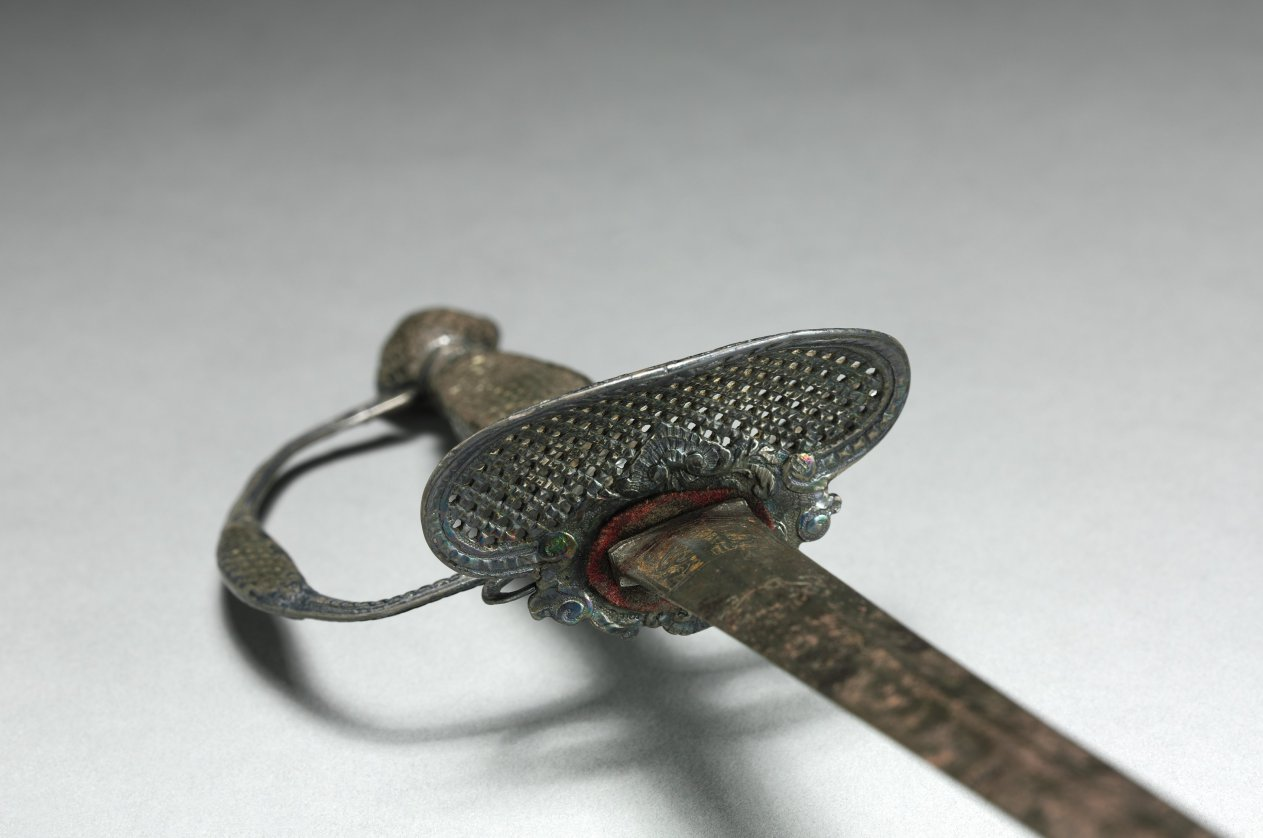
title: Child's Sword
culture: France, Paris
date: c 1780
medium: stainless steel, silver and brass wire inlay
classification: Arms and Armor